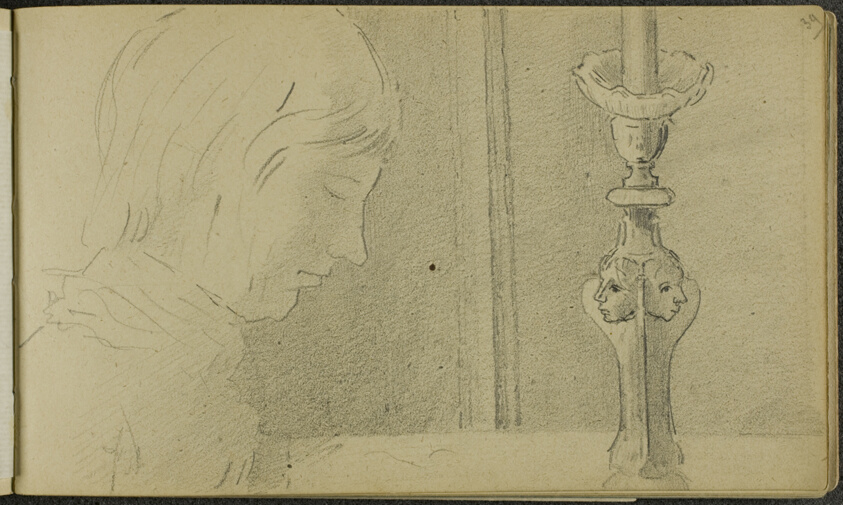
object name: Book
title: Sketchbook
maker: Odilon Redon (French, 1840-1916)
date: c. 1879–85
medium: 55-page sketch book of drawings in pencil on cream wove (with a few buff and blue) paper, with (simulated) laid paper interleaves, bound in black cardboard with black fabric taping on spine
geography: France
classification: sketchbook; graphite; prints and drawing; book; paper